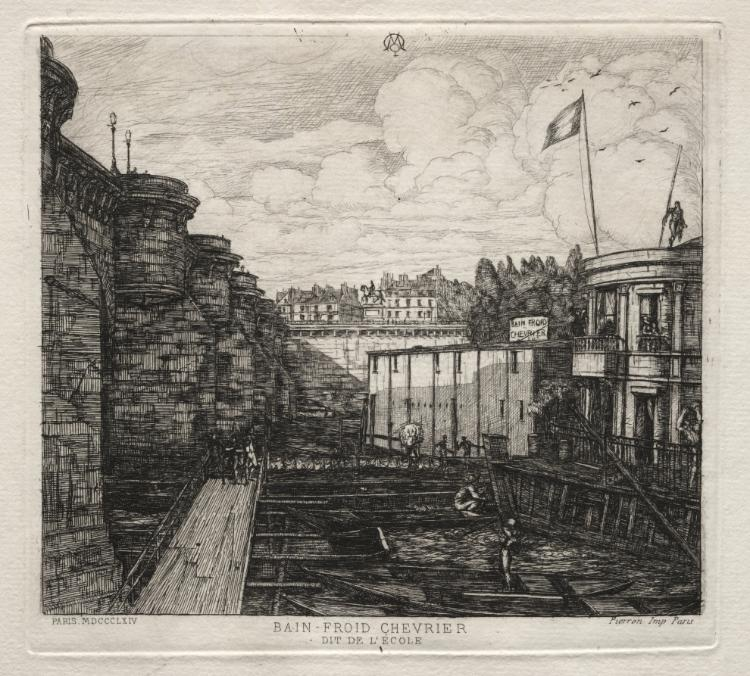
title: Chevrier's Cold Bath Establishment, Paris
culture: France, 19th century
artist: Charles Meryon (French, 1821–1868)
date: 1864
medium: etching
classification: Print